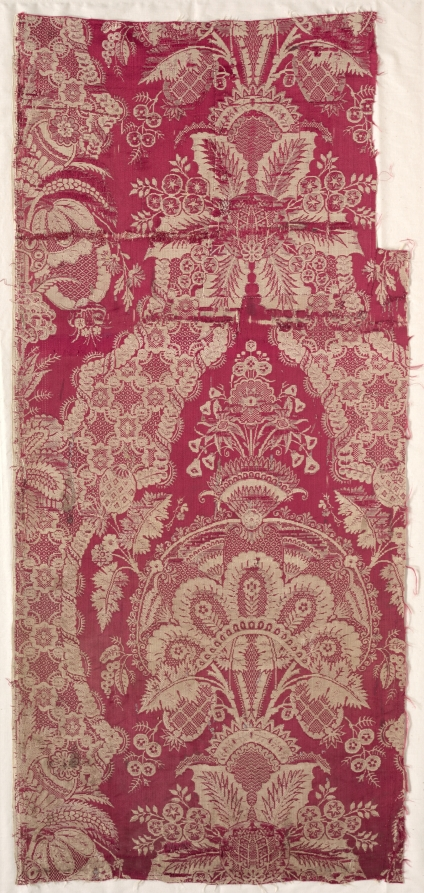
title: Fragment of Textile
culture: France, early 18th century, late Baroque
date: c. 1700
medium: lampas weave, silk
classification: Textile